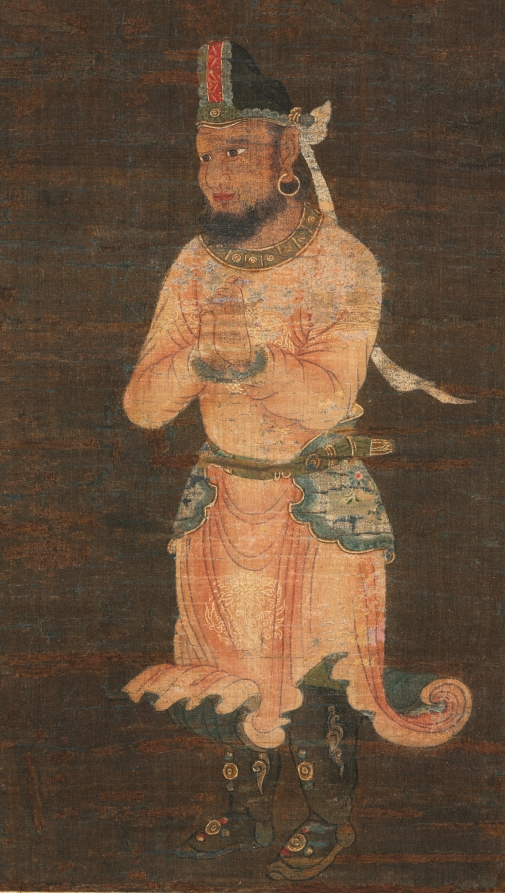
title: Shakyamuni Triad: Buddha Attended by Manjushri and Samantabhadra (Bodhisattva with Lion)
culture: China, Fuzhou, Fujian Province, Yuan dynasty (1271-1368)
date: late 1300s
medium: Hanging scroll; ink and color on silk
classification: Painting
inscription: Inscription at the bottom of the central scroll reads: "Da Song Fuzhou fu…(Fuzhou prefecture of the great Song)."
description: This triptych is a rare example of Yuan Buddhist painting. It depicts the historic Buddha Shakyamuni flanked by two attending bodhisattvas, Manjushri (the bodhisattva of wisdom, riding a lion) and Samantabhadra (the bodhisattva of universal virtue, riding an elephant). Below them are others seeking enlightenment: two disciples of the Buddha (Ananada and Kasyapa), two non-Chinese people, a boy with topknots, and a female worshiper. The clouds above and around the divine beings form one scene that illustrates Shakyamuni’s sermon from the Lotus Sutra. This text became an important basis for Buddhist faith throughout East Asia and was central to the Mahayana school of Buddhism.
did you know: Manjushri, the bodhisattva of wisdom, leads the child Sudhana on his quest for enlightenment.